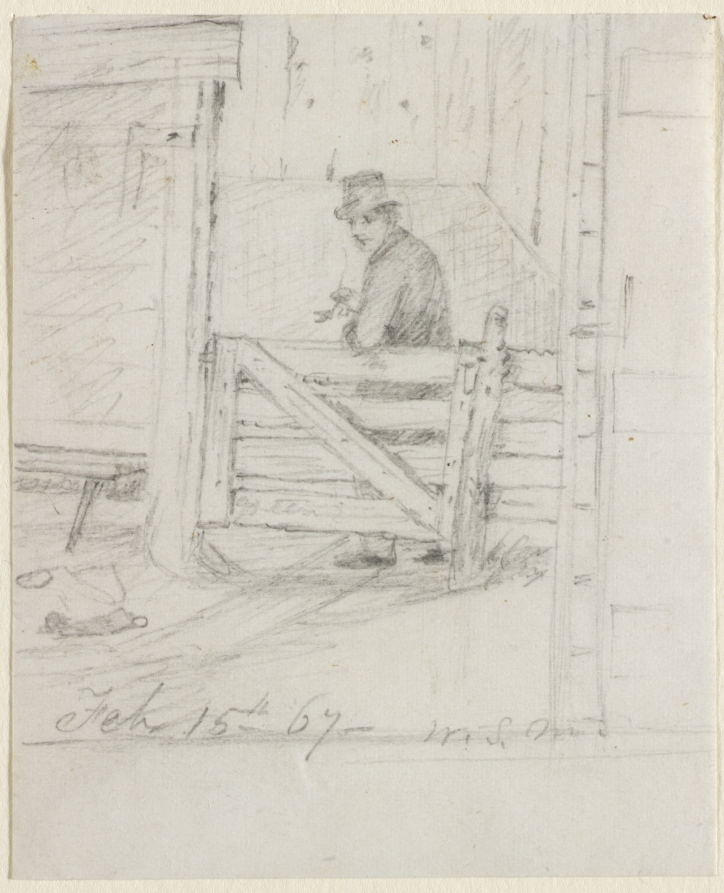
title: Resting on the Fence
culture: America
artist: William Sidney Mount (American, 1807–1868)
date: 1867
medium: graphite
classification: Drawing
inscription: signed, across bottom, in graphite: Feb. 15th 67- W.S.M.